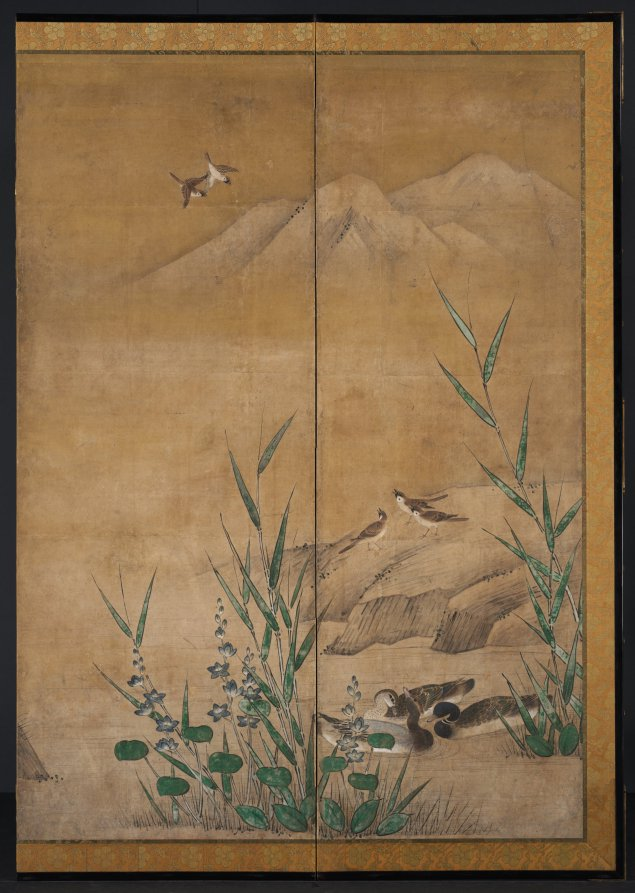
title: Birds and Flowers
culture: Japan, Momoyama period (1573–1615)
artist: attributed to Kano Mitsunobu (Japanese, 1565–1608)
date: late 1500s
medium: One of a pair of six-panel folding screens; ink, color, and gold on paper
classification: Painting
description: The landscape depicted in this pair of screens follows a seasonal progression from right to left, starting with the blossoming plum of early spring and ending with late autumn peonies. A variety of smaller birds are positioned throughout the scene, and a trio of swimming ducks is bracketed by early summer irises and early autumn bellflowers at the center. While some raptors (birds of prey) terrorize a pheasant and an egret (a waterfowl) to the right, a peacock and peahen converse to the left. Hawks are associated with military prowess, while the peafowl suggest cultural prestige.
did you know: As masters of the Kano academic painting style, both Kano Shōei and Kano Mitsunobu favored Chinese-inspired subject matter, such as birds and flowers.